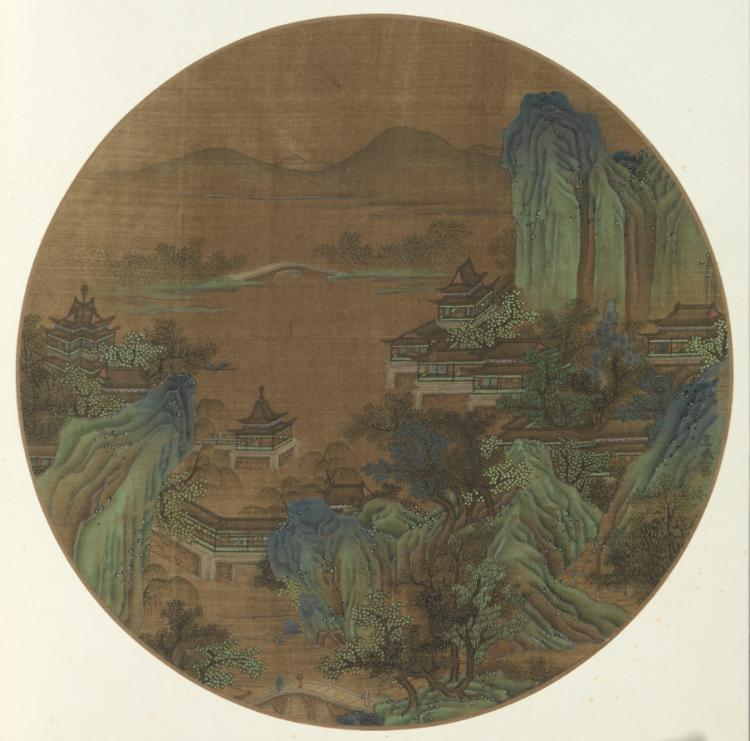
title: Lake Scene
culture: China, Ming dynasty (1368-1644) ?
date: 1368–1644(?)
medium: Album leaf, ink and color on silk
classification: Painting